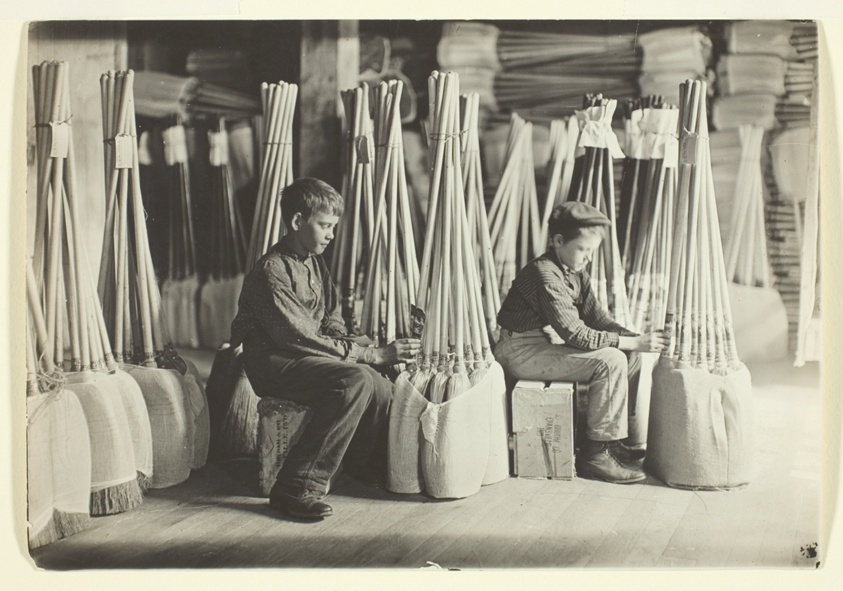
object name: Photograph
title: Boys in Packing Room, Brown Mfg. Company, Evansville, Ind.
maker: Lewis Wickes Hine (American, 1874–1940)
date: October 1908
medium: Gelatin silver print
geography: United States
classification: gelatin silver (developing-out-paper) pr; photographic process; photography; photograph